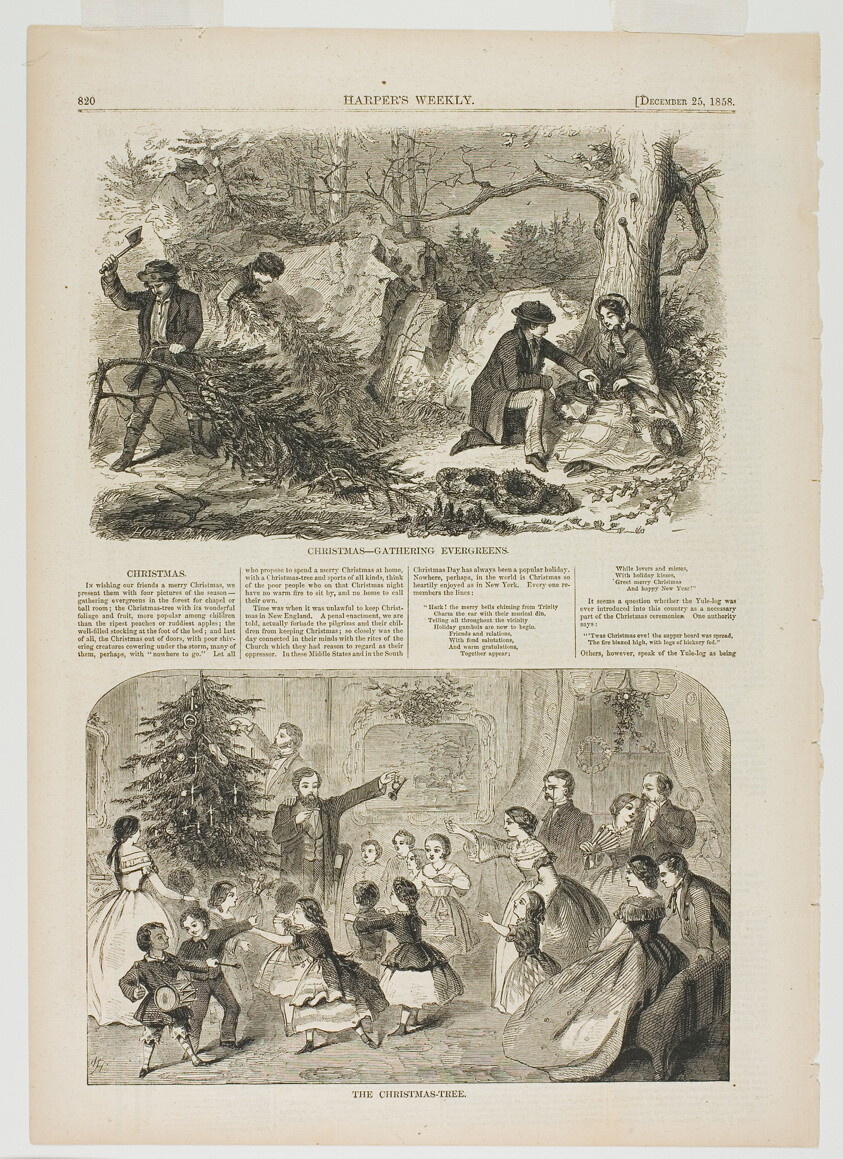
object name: Print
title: Christmas—Gathering Evergreens and The Christmas-Tree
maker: Winslow Homer (American, 1836-1910); published by Harper's Weekly (American, 1857-1916)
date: published December 25, 1858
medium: Wood engravings on paper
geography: United States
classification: wood engraving; print; prints and drawing